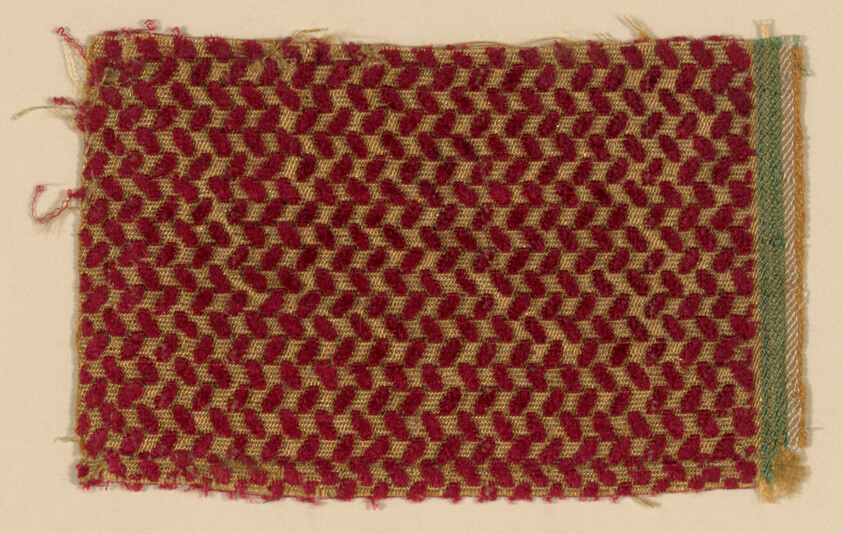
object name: Textile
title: Fragment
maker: Italy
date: 1775/1800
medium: Silk and silvered-metal strips, warp-float faced twill weave with supplementary facing wefts and suplementary pile warps forming cut and uncut voided velvet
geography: Italy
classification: textile; weaving - velvet; weaving